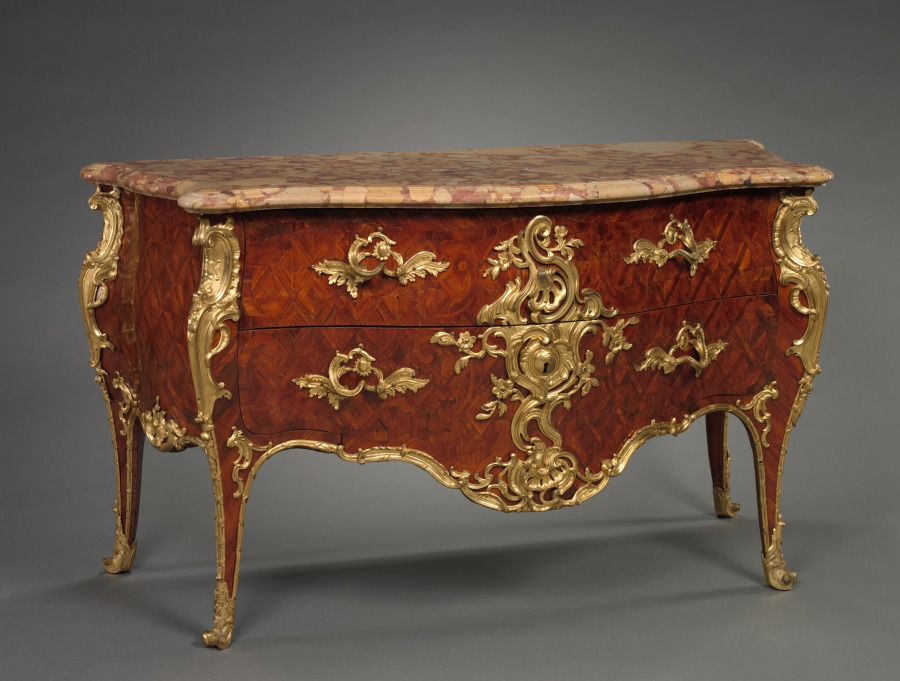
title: Chest of Drawers (Commode)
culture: France, Paris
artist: Jean-Pierre Latz (French, 1691–1754)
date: c. 1750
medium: oak, tulipwood marquetry, gilt metal mounts, marble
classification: Furniture and woodwork